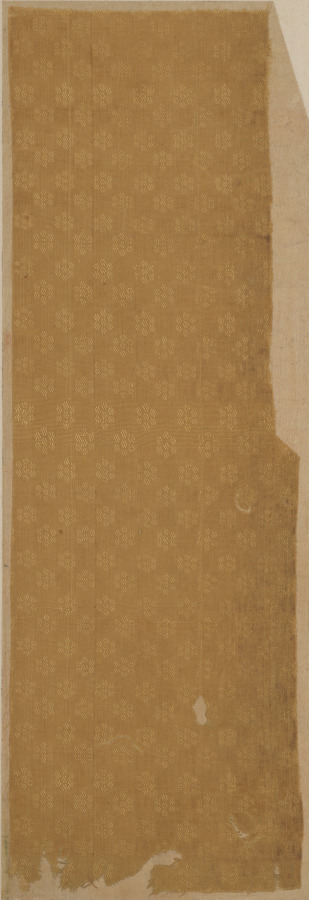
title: Fragment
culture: China, 8th century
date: 700s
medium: tabby ground and twill pattern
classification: Textile